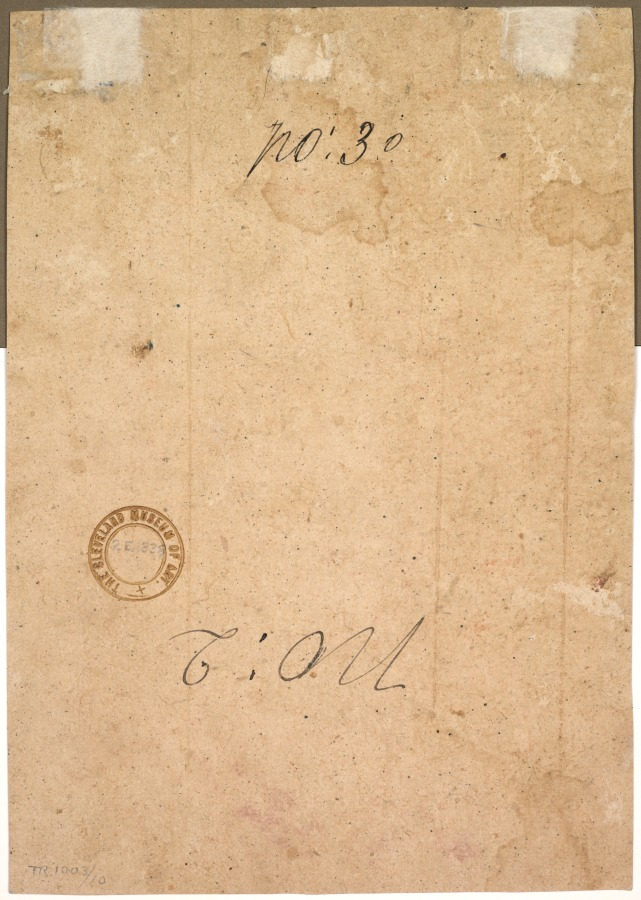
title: Raja Gulab Singh (1792–1857) of Jammu and Kashmir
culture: Northern India, Pahari kingdoms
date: c. 1830–40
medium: Gum tempera, gold, and silver on paper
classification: Painting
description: Maharaja Gulab Singh of the Hindu Dogra dynasty founded the princely state of Jammu and Kashmir in 1846. In this equestrian portrait, the umbrella is a sign of royalty, the sword and shield indicate his status as a warrior, and the hookah projects an image of noble refinement.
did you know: Ananda K. Coomaraswamy (1877–1947), who sold this painting to the CMA, was a curator of Indian art at the Museum of Fine Arts, Boston and a prolific author of art historical and philosophical works.